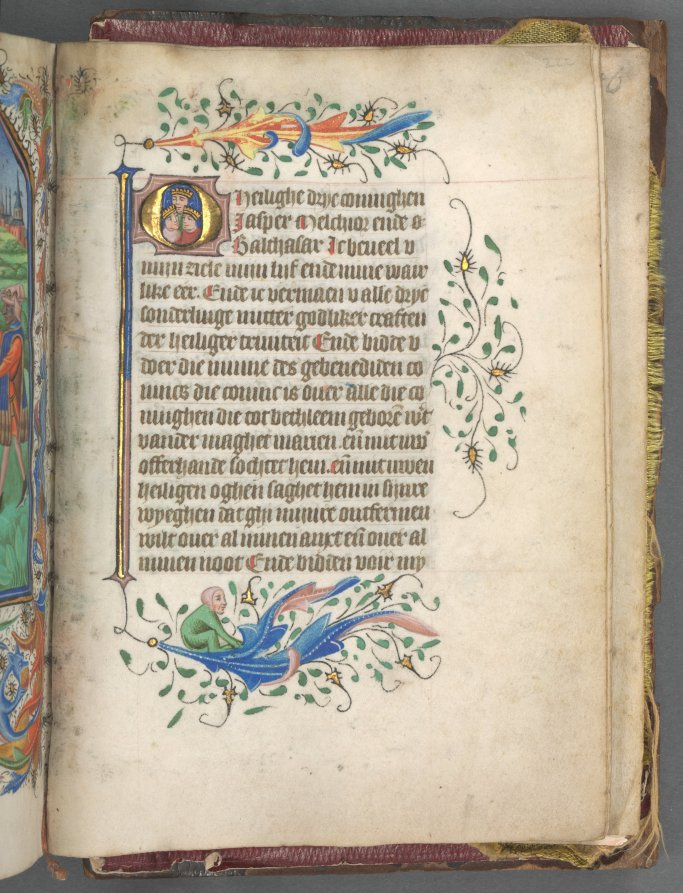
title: Book of Hours (Use of Utrecht): fol. 222r, Initial with Three Kings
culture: Netherlands, Utrecht, 15th century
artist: Master of Gijsbrecht van Brederode (Netherlandish)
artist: Master of the Boston City of God (Netherlandish)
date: c. 1460–1465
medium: ink, tempera, and gold on vellum; binding: brown Morocco over original wooden boards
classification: Bound Volume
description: This manuscript is a collaborative effort of two talented illuminators with distinctive styles. Ninety-seven historiated initials (letters containing scenes), including the one on recto (right side) shown here, are by the Master of the Boston City of God, a painter who worked in Utrecht. Four full-page miniatures (small paintings), including the Nativity on the verso (left side), have recently been attributed to the Master of Gijsbrecht van Brederode. The background of the Nativity depicts a distant cityscape (perhaps Utrecht), adjacent to which may be seen the Journey of the Magi and the Annunciation to the Shepherds. In the left margin, the Virgin Mary (above) appears to the Roman Emperor Augustus and the Tiburtine Sibyl, who, according to legend, foretold the coming of Christ. This volume is not written in Latin, but in a Dutch littera textualis, an elegant Gothic bookhand.